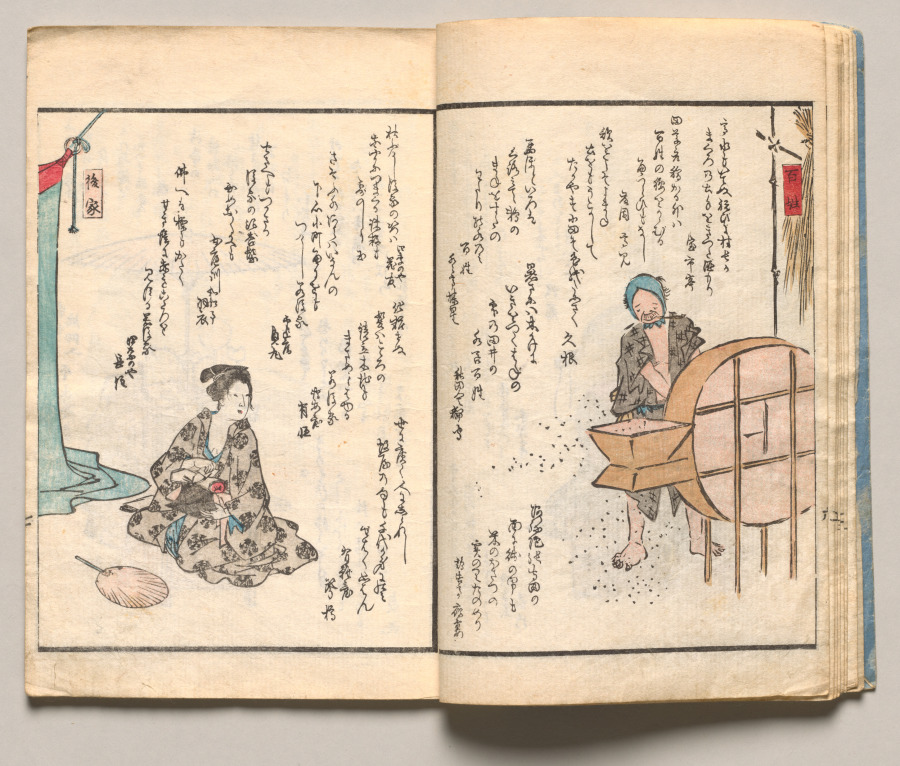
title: Spread Eight from Volume One of People of Japan in Light Verse (Kyōka)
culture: Japan, Edo period (1615–1868)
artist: Utagawa Hiroshige (Japanese, 1797–1858)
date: 1857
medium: Woodblock-printed book; ink and color on paper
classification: Bound Volume